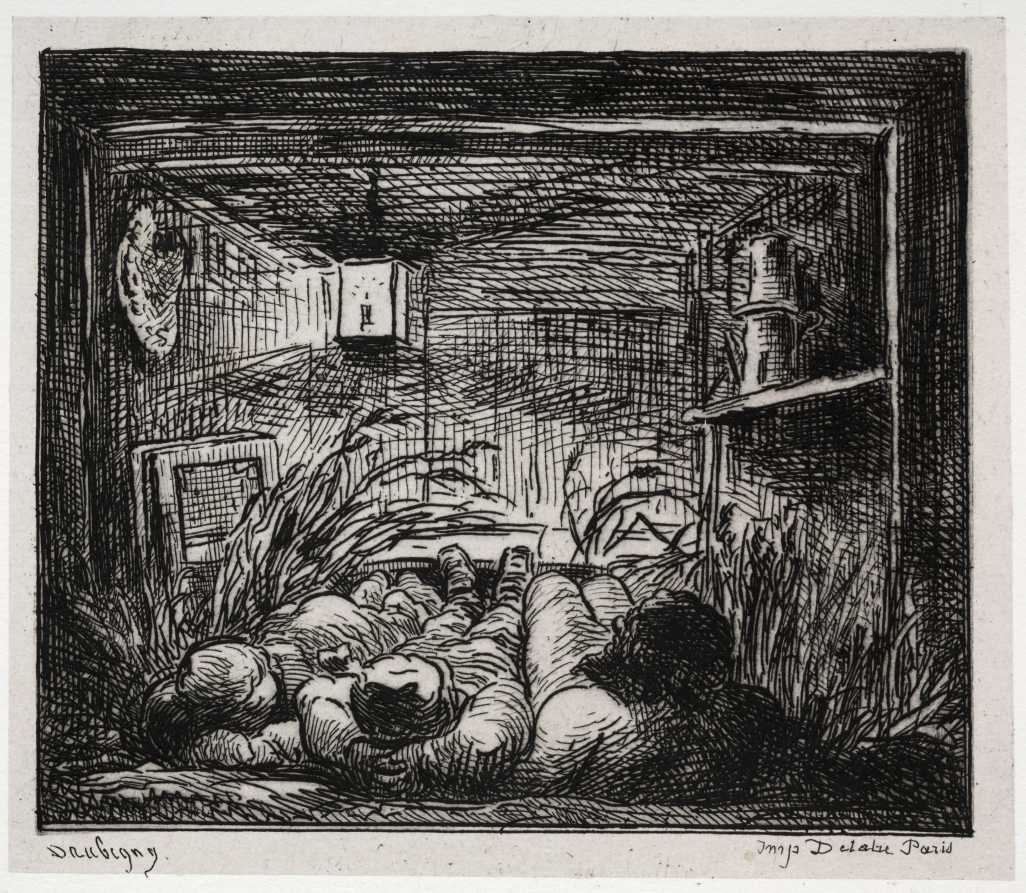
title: The Boat Trip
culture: France, 19th century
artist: Charles François Daubigny (French, 1817–1878)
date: 1861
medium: 16 etchings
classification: Portfolio